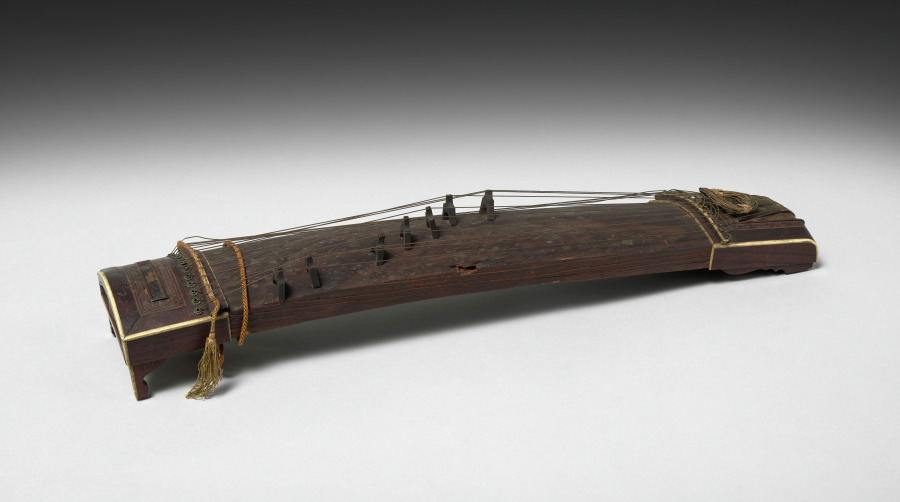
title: Koto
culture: Japan, Edo period (1615–1868)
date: early to mid-1800s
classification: Musical Instrument